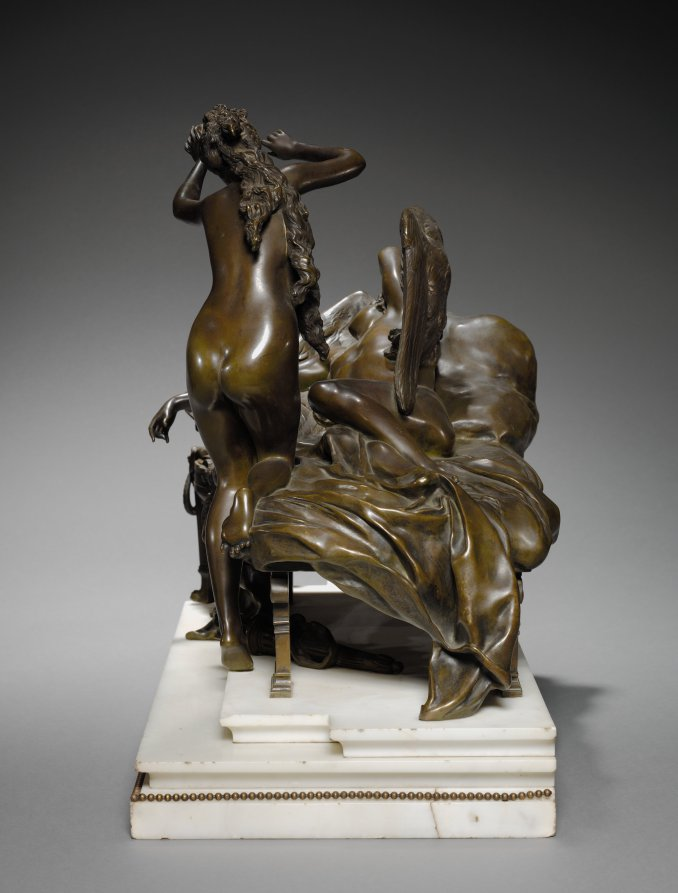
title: Cupid and Psyche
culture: France, 19th century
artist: Albert-Ernest Carrier-Belleuse (French, 1824–1887)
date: c. 1870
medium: bronze with marble base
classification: Sculpture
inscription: signed in ligature on edge of couch at head: "Carrier Belleuse."